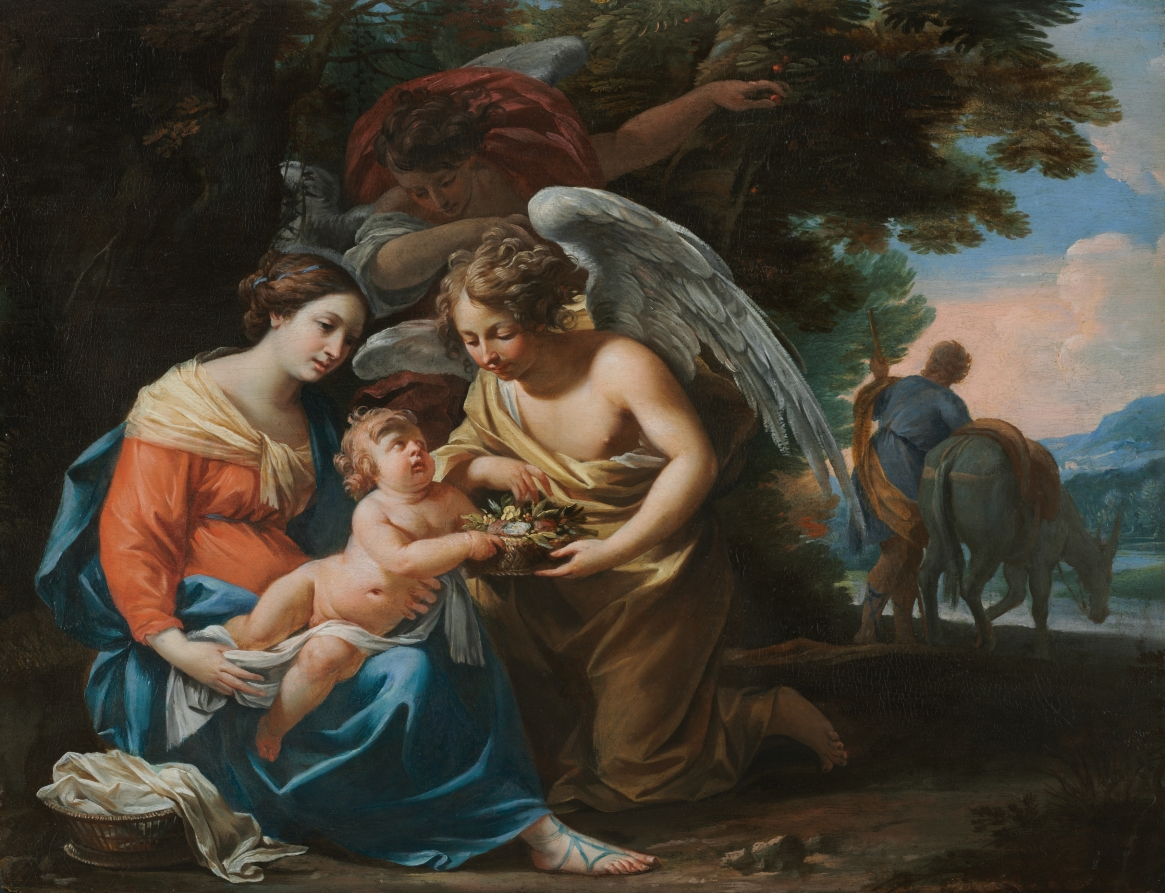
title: Rest on the Flight into Egypt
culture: France, 17th century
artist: Charles Poërson (French, 1609–1667)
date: c. 1640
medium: oil on wood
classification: Painting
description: Formerly ascribed to the French painter Simon Vouet (1590-1649), Rest on the Flight into Egypt has only recently been attributed to Poerson, a collaborator and follower of Vouet. Intended to be a small devotional picture, this painting on oak panel depicts a quiet scene of the Holy Family resting; the Virgin Mary sits while an angel brings the plump young Christ Child fruit, and St. Joseph leads their donkey away to graze. The delicate pinks and blues and the transparent treatment of light and shadow create a gentle domestic atmosphere, characteristic of Vouet's Italian-influenced work.